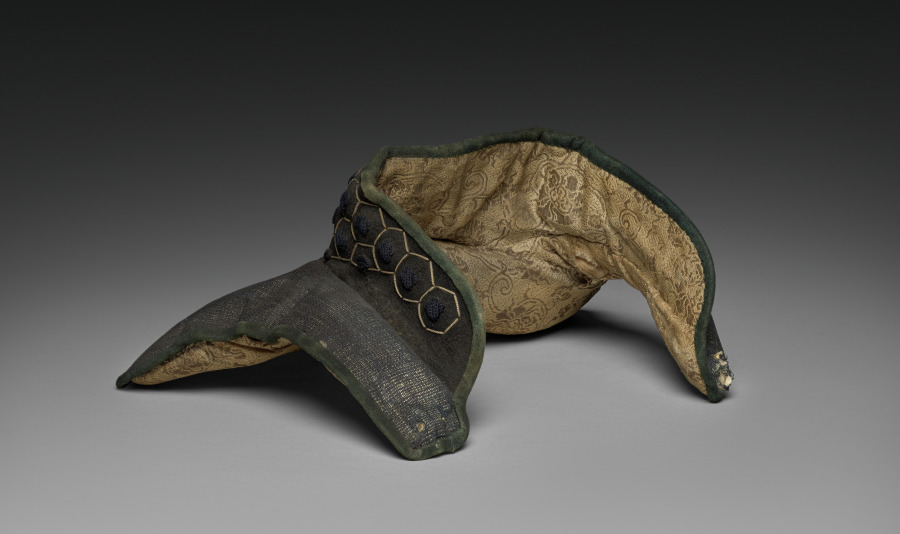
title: Collar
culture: Japan, Edo period (1615–1868)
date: 1600s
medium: Iron, lacquer, textile (silk)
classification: Arms and Armor